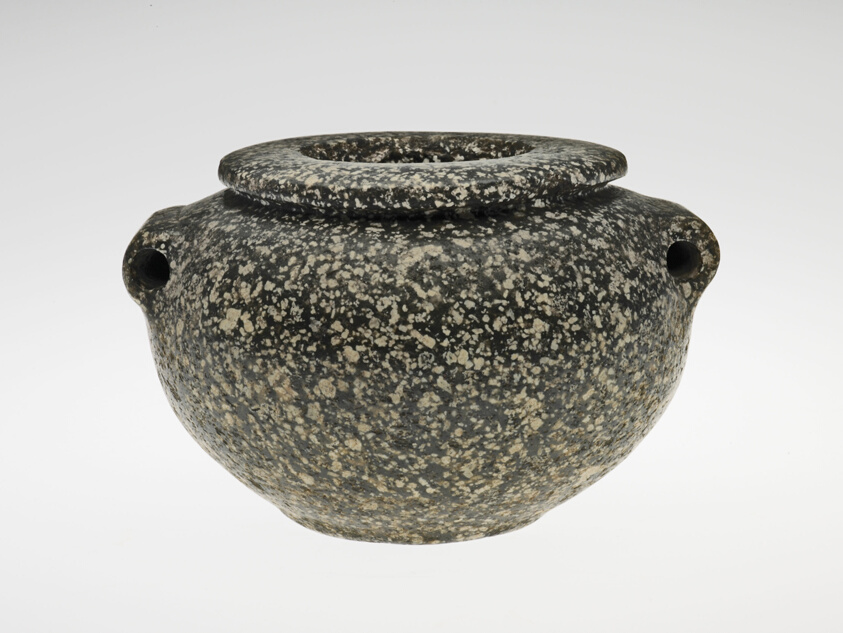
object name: Vessel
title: Vessel with Lug Handles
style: old kingdom, egyptian, ancient, predynastic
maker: Egyptian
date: Predynastic Period/Old Kingdom (about 4000–2250 BCE)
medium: Stone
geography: Egypt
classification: vessel; stone; ancient art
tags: containers